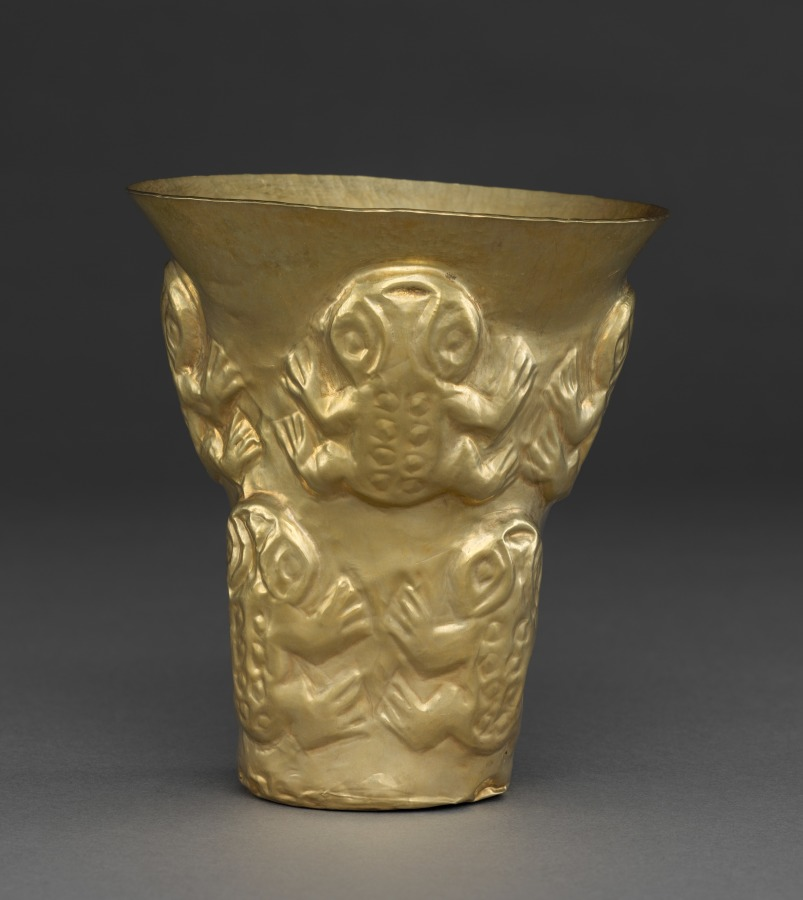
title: Beaker with Frogs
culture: Central Andes (Peru), Lambayeque (Sicán) people, 10th century-12th century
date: 900–1100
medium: gold, hammered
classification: Metalwork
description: This beaker was created by an artist of the Lambayeque culture of Peru's north coast. High-relief frogs grace the surface, which has a dramatically flaring rim as well as a silvery color, the result of silver in the alloy. If such beakers were used in life—that is, not created exclusively for the lavish tombs in which they have been found in quantities—they may have figured in feasting events that were central to late pre-Hispanic political, social, and religious life.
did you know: This beaker was probably formed using a single sheet of metal over a wooden form.